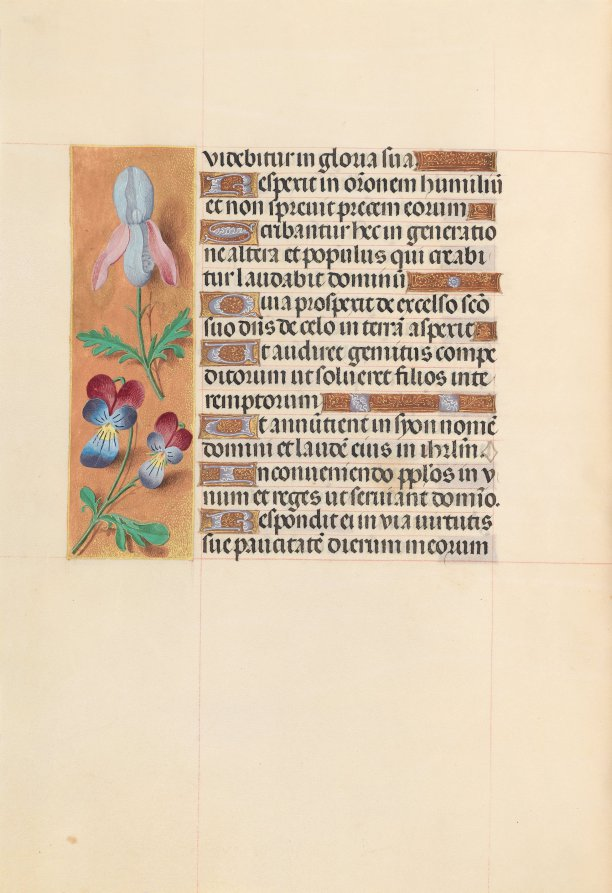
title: Hours of Queen Isabella the Catholic, Queen of Spain: Fol. 207v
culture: Flanders, Ghent and Bruges, late 15th century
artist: Master of the First Prayerbook of Maximillian (Flemish, c. 1444–1519)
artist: and Associates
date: c. 1500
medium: ink, tempera, and gold on vellum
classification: Bound Volume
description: This manuscript was illuminated by a circle of at least five highly organized manuscript painters active in the Flemish cities of Ghent and Bruges. The principal illuminator was Alexander Bening, who painted the majority of the book's miniatures. Manuscripts produced by this circle of artists are renowned for the decoration of their borders, which typically feature a rich variety of realistically-painted flowers, birds, and butterflies. This prayer book, called a book of hours, was intended not for a cleric, but for the private devotions of a lay person-in this case, Isabella the Catholic, Queen of Spain (1451-1504). Isabella's coat of arms embellishes the book's frontispiece. It is unlikely that the book was commissioned by the Queen herself; rather, she probably received it as a diplomatic gift from someone courting her patronage, perhaps Cardinal Francisco Jimenez de Cisneros. A Franciscan friar, Jimenez was dependent upon Isabella for his advancement, first to the post of Queen's confessor in 1492, and then to Archbishop of Toledo in 1495.